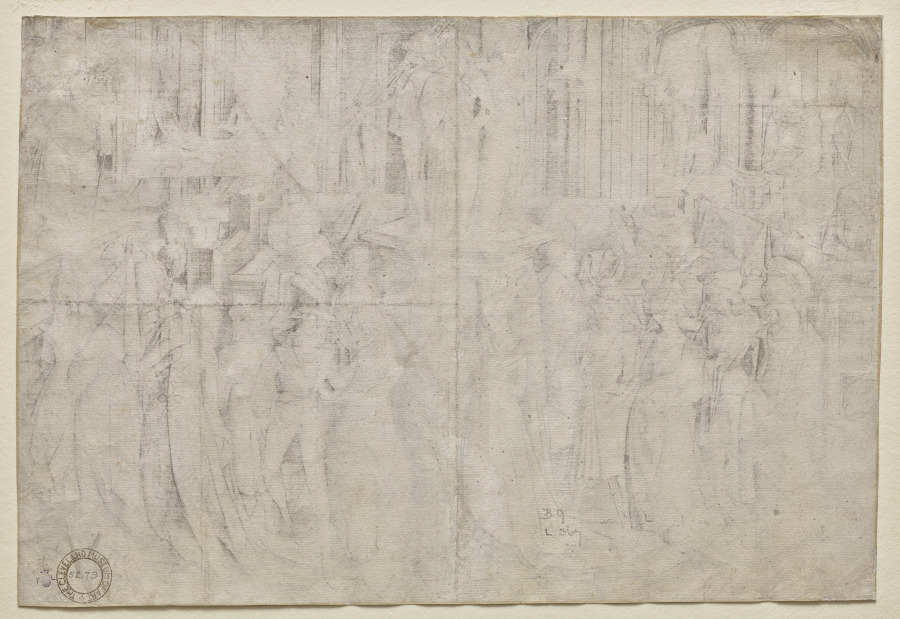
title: The Dance at the Court of Herod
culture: Germany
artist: Israhel van Meckenem (German, c. 1440–1503)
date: c. 1500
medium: engraving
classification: Print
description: In this imaginative composition, Meckenem combines John the Baptist’s beheading with a courtly promenade. The religious narrative’s gruesome episodes occur in the background, where Salome collects the saint’s severed head on a platter and then presents it at Herod’s banquet table. Salome appears a third time in the foreground, where she dances with a lusty suitor who grabs her waist instead of politely holding her hand.